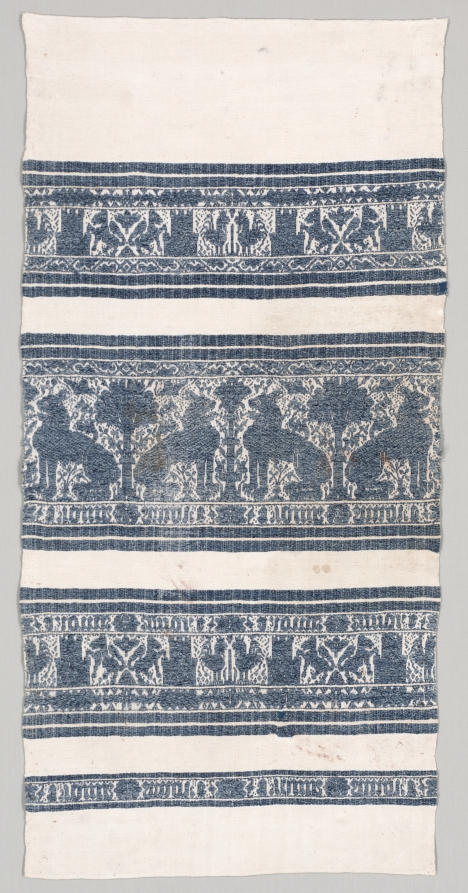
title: Towel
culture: Italy, Perugia (?)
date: c. 1500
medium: cotton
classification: Textile